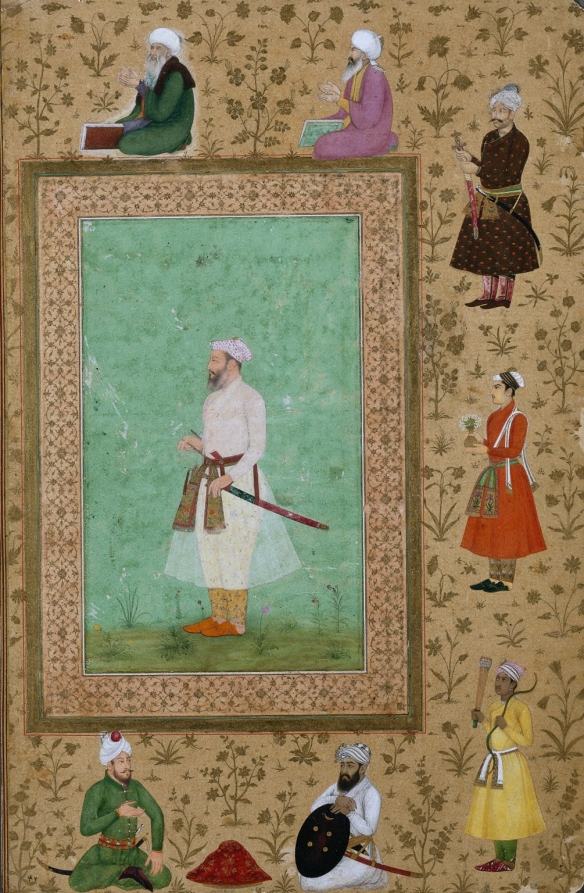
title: Portrait of Asaf Khan (1569–1641), from the Late Shah Jahan Album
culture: Mughal India, court of Shah Jahan (1627–58)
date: c. 1653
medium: Gum tempera and gold on paper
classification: Painting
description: Asaf Khan, born in Iran, was a general and close advisor to Mughal emperors Jahangir (reigned 1605–27) and Shah Jahan (reigned 1627–58). He was also Jahangir’s brother-in-law and Shah Jahan’s father-in-law. The figures in the borders show that Asaf Khan was both a scholar and a soldier. At the top, mullahs (learned Muslim clerics) with books gesture in discourse, while two soldiers converse at ease below. Three retainers stand at the side presenting a sword, a vase of narcissus, a bow, and arrows. He has strapped on a sheathed sword and tucked a stabbing dagger and book into his elegantly embroidered floral sash.